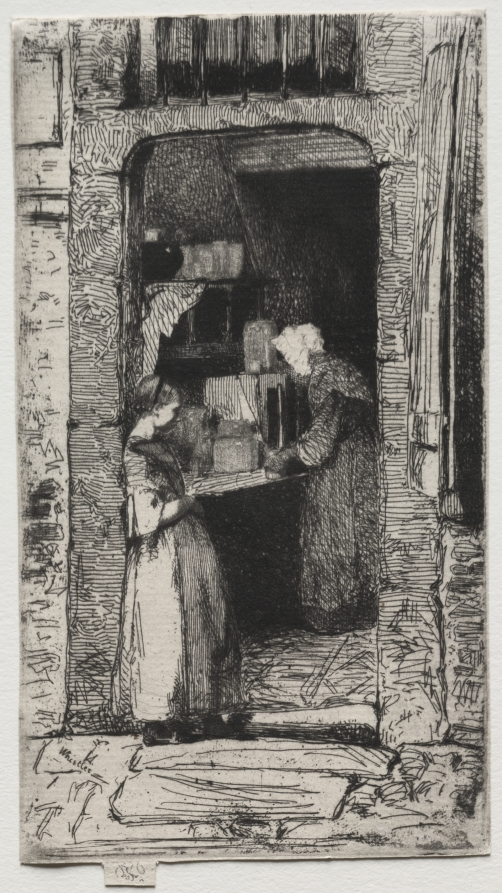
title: La Marchande de Moutards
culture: America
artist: James McNeill Whistler (American, 1834–1903)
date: 1858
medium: etching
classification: Print